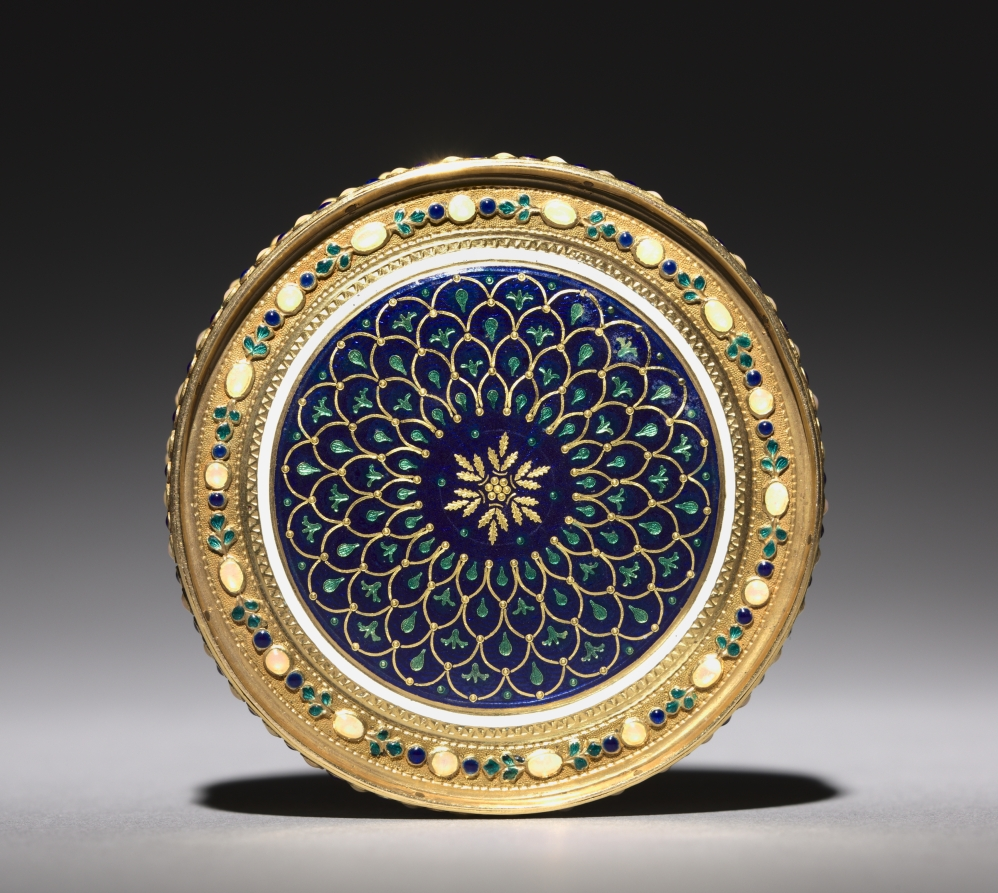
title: Powder Box (Poudrier)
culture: France, 18th century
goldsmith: Jean-Joseph Barrière (French)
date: 1779–80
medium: enamel on gold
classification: Miscellaneous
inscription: [Maker's mark of Jean-Joseph Barrière, master goldsmith in 1763, bottom; exterior wall; inside cover]: "JJB"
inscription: [Warden's mark for Paris, 1779-1780, exterior wall]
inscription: [Discharge mark of Henry Clavel I, Paris, 1780-1782, exterior wall]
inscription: [Counter-mark of Henry Clavel I and Jean-Francois Kalendrin, Paris,1782-1789, exterior wall]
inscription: [Restricted warranty mark for gold, Paris, exterior wall]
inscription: [Three illegible marks, bottom]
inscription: [Three illegible marks, cover]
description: In the 1700s ornately enameled boxes became a popular accessory in the French court. These boxes often held powdered tobacco, called snuff. However, this box, which is unhinged, likely held powder, rouge, or face cream. Pageantry and performance were important aspects of social interaction during this period. The extravagant designs and associated functions of these boxes communicated social and political status.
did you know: Jean-Joseph Barrière received his designation of master goldsmith in 1763, a coveted title that required candidates to complete a lengthy apprenticeship followed by a test of skill.